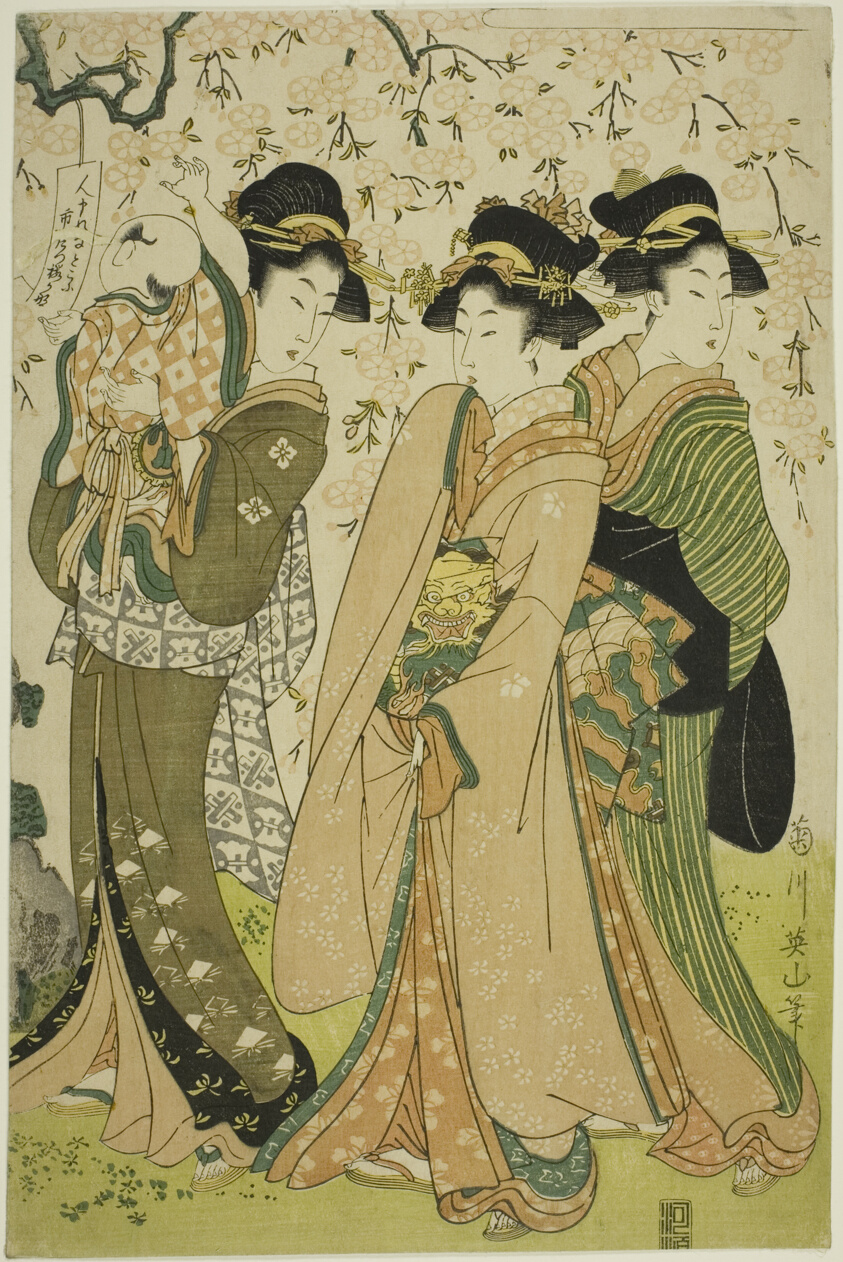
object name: Print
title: Famous Trees in the Eastern Capital: The Cherry Tree at Naruko (Toto meiboku Naruko no sakura)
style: Japanese (culture or style)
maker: Kikukawa Eizan (Japanese, 1787-1867)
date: c. 1807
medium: Color woodblock print; right sheet of oban triptych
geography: Japan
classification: woodblock print; print; asian art